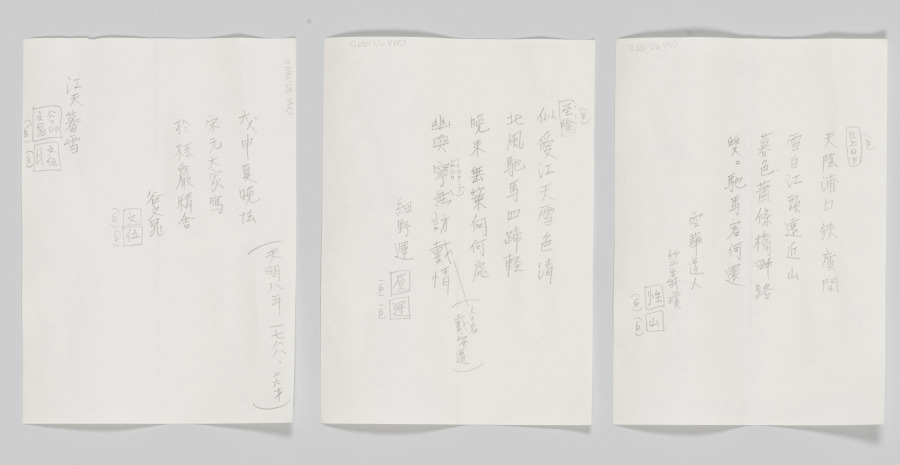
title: Evening Snow Blending River and Sky, from Eight Views of Xiao-Xiang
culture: Japan, Edo period (1615–1868)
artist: Tani Bunchō (Japanese, 1763–1841)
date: 1788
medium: album leaf remounted as a hanging scroll; ink and color on paper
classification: Painting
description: This painting was part of a set of album leaves representing the Eight Views of Xiao-Xiang, a theme originating in Chinese poetry and painting that spread to both Korea and Japan. Southern China’s Xiao-Xiang area, where the mist-covered banks of the Xiang River created a complex landscape shifting like the moods and minds of people, captured the imaginations of generations of painters and calligraphers. Inscriptions on these works suggest that they were possibly ordered by newly prominent Japanese Confucian scholars.